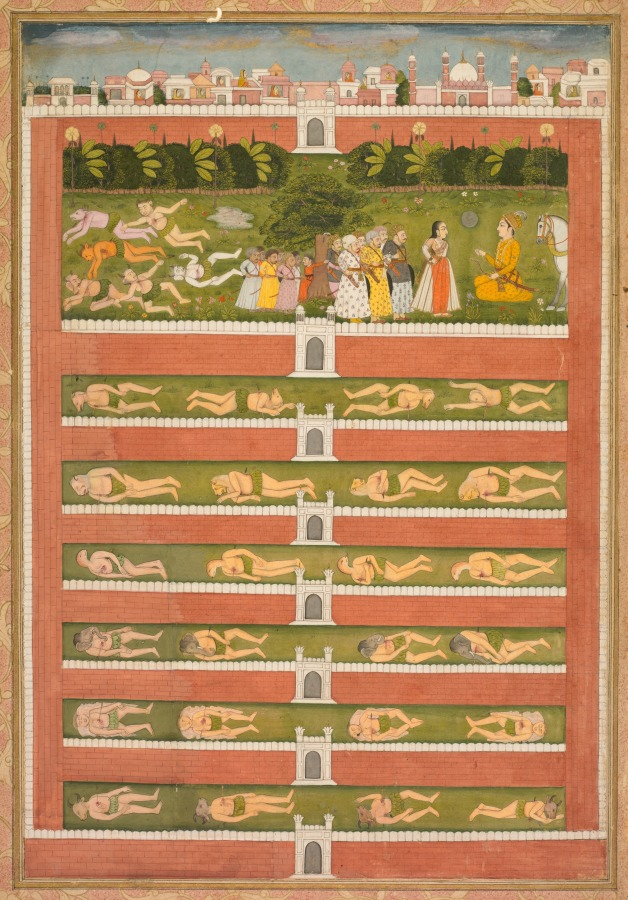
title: A Princess and Demons before a Nobleman: A Leaf from a Poetical Romance Relating to Shah Alam I (recto)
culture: Mughal India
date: c. 1710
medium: Gum tempera, ink, and gold on paper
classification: Painting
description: The source story of this painting remains enigmatic to scholars, but it includes a range of depictions of the “other”––from the foreign to the demonic. A prince kneeling in front of his horse addresses a lady; the moon in front of her face may identify her as Mahliqa (“moonlike” in Arabic), the Chinese princess identified by inscription on the adjacent page. A group of men whose eyes hang vertically stand behind her. Horned figures with grass skirts lie slain behind them, presumably killed by the kneeling prince conspicuously holding a bow. The city in the background, at the top of the painting, is populated solely by women, and its eight surrounding walls are interspersed with slain composite creatures wearing leaf skirts, which may identify them as bands of forest-dwellers, or tribal groups.